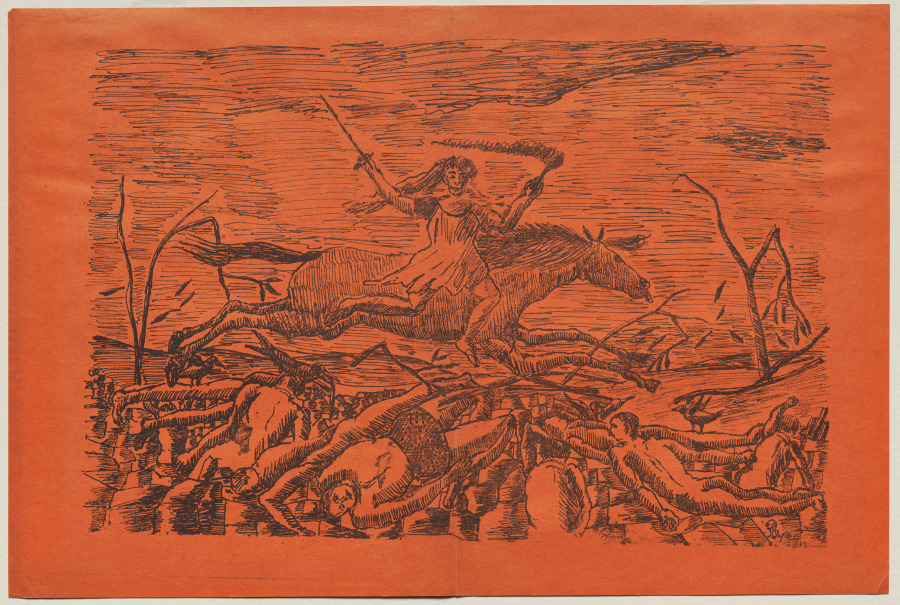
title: The War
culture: France, 19th century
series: Symbolist journal Ymagier II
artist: Henri Rousseau (French, 1844–1910)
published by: Rèmy de Gourmont and Alfred Jarry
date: 1894–1895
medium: lithograph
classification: Print